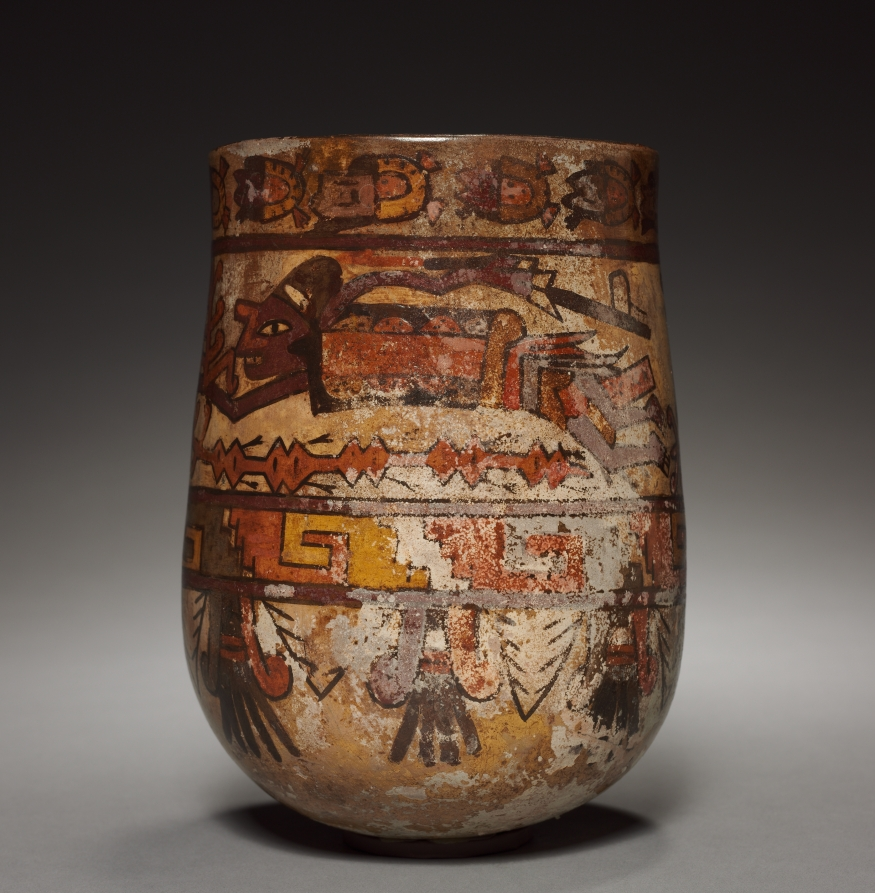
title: Vase with Trophy-heads and Warriors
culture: Peru, South Coast, Nasca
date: c. 450–600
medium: earthenware with colored slips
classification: Ceramic